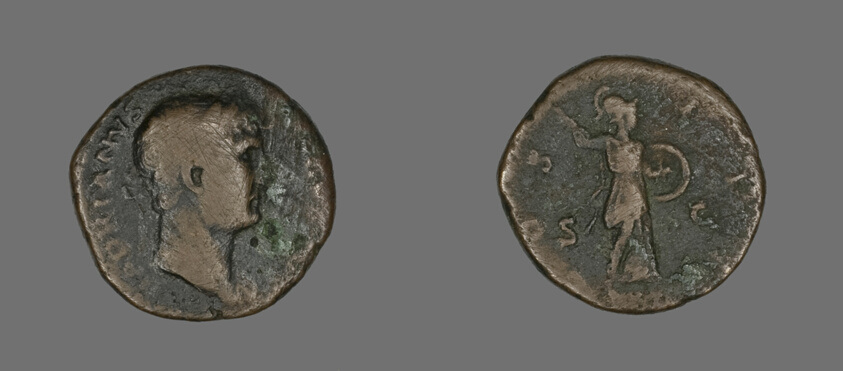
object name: Coin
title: Sestertius (Coin) Portraying Emperor Hadrian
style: roman (ancient, style or period), ancient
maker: Roman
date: 117-138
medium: Bronze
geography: Roman Empire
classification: coin; ancient art